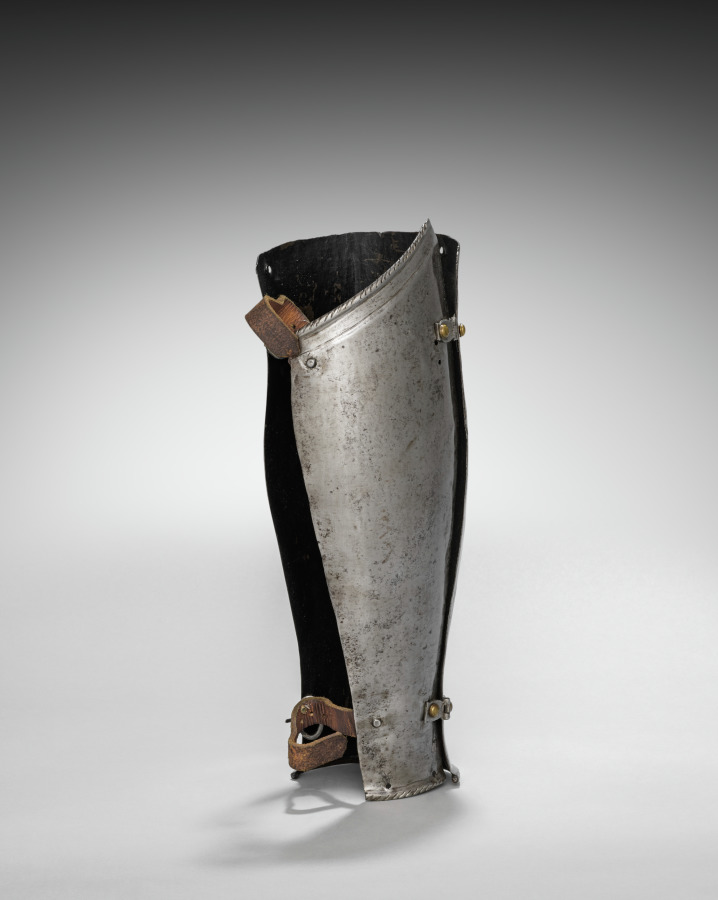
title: Proper Right Greave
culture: South Germany, 16th century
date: c. 1560–1580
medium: steel, leather straps, brass rivets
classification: Arms and Armor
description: This armor was developed for the joust-a sporting combat between two mounted contestants. Although all of the elements of this armor date from the same period, they are not all from the same suit. This armor is thus called "composed." It also shows the asymmetry of jousting armor. The participants rode along a wall-like barrier known as a "tilt" with their left sides facing one another. Consequently, armor on that side of the body had to be thicker. Note the large plate (grandguard) over the left shoulder for extra protection. Also, the breathing holes in the helmet were placed on the right side (farthest from an opponent's lance) to avoid injuries from splinters. The bracket attached to the right breastplate is called the lance-rest, a shock-absorbing support designed to accommodate the lance when "couched" under the right armpit.